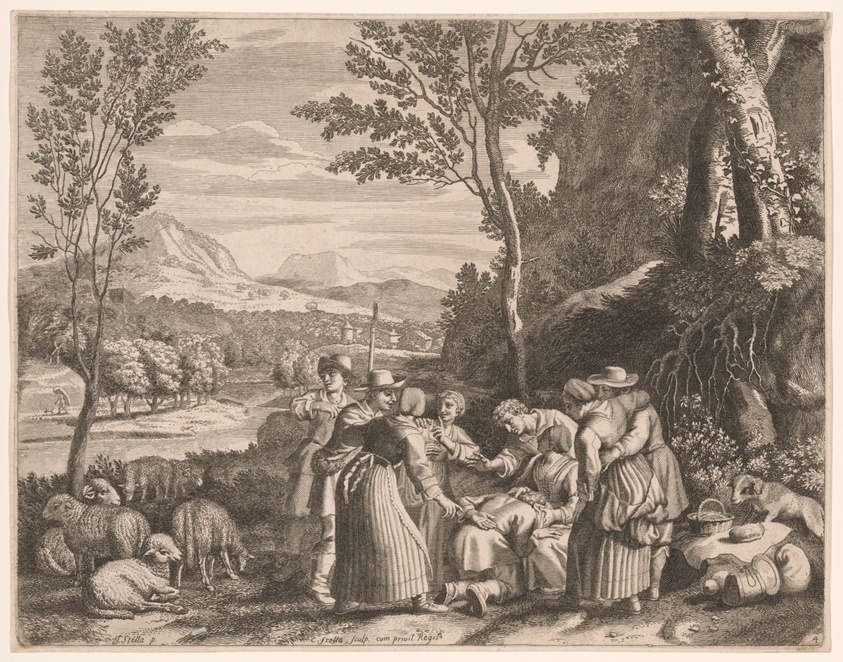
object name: Print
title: The Slap, Plate 4 from Pastorales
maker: Claudine Bouzonnet-Stella (French, 1636–1697); after Jacques Stella (French, 1596-1657)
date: 1667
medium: Etching in black on cream laid paper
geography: France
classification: prints and drawing; paper; etching; print